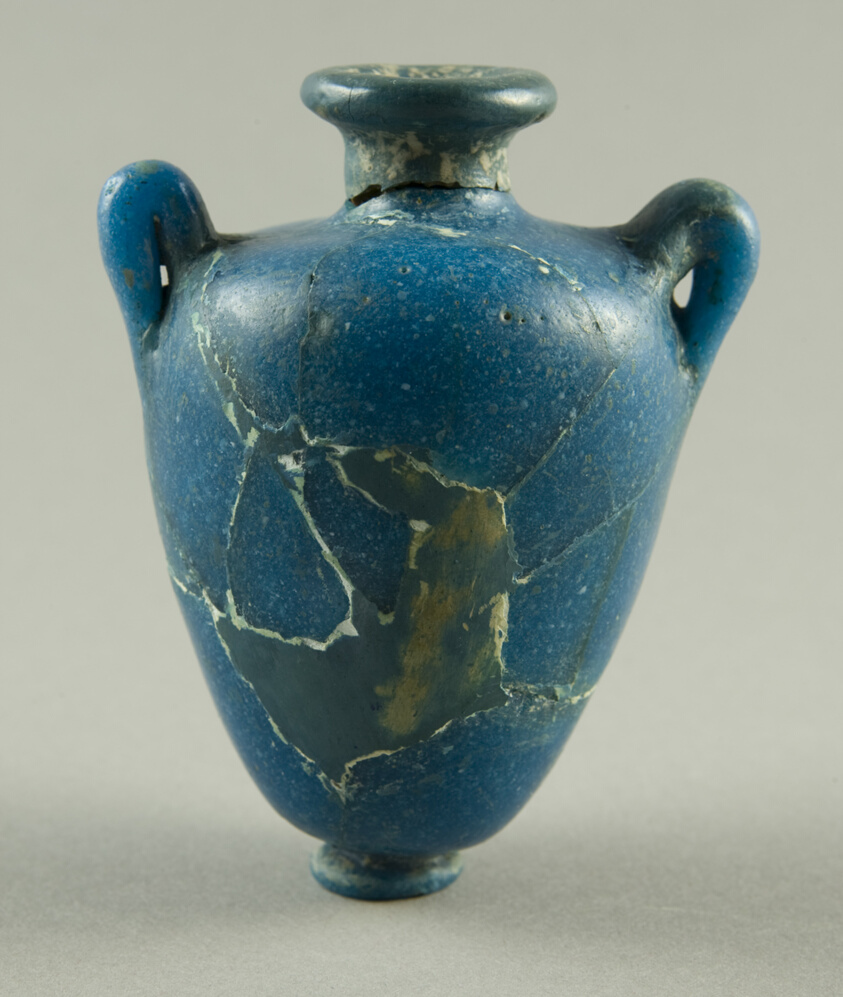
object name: Vessel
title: Vase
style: new kingdom, egyptian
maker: Egyptian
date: New Kingdom Period, Dynasty 19 (1292–1202 BCE)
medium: Glass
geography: Egypt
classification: glass; vessel; ancient art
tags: vase